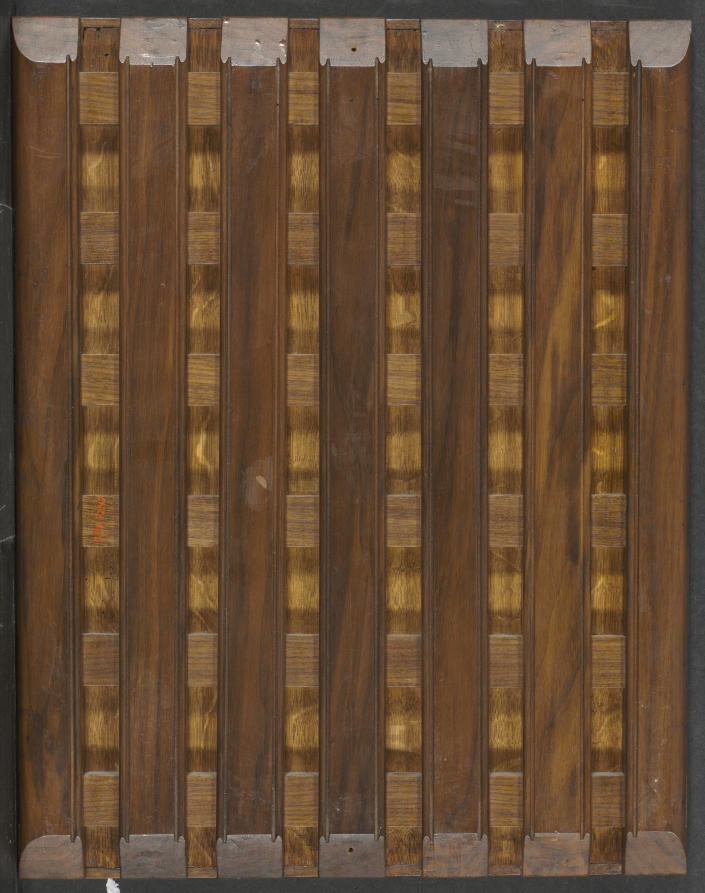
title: Virgin and Child in a Landscape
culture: Flanders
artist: Jan Gossaert (Flemish, c. 1475/78–1532)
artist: and an Anonymous Landscape Painter (Flemish)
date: 1531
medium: oil on wood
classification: Painting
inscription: Signed lower left: "1531 / JOANES / MALBO [...] / PÏGEBAT"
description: Among the first northern European artists to study in Rome, Gossaert returned north to serve in various German and Flemish courts, incorporating Italian Renaissance ideas. Gossaert also painted the frame, including the Latin inscription: "Mother, may your contemplation be our reconciliation." The patron is likely Mencía de Mendoza, a Spanish noblewoman, one of the most important art collectors and intellectuals of the early 1500s.